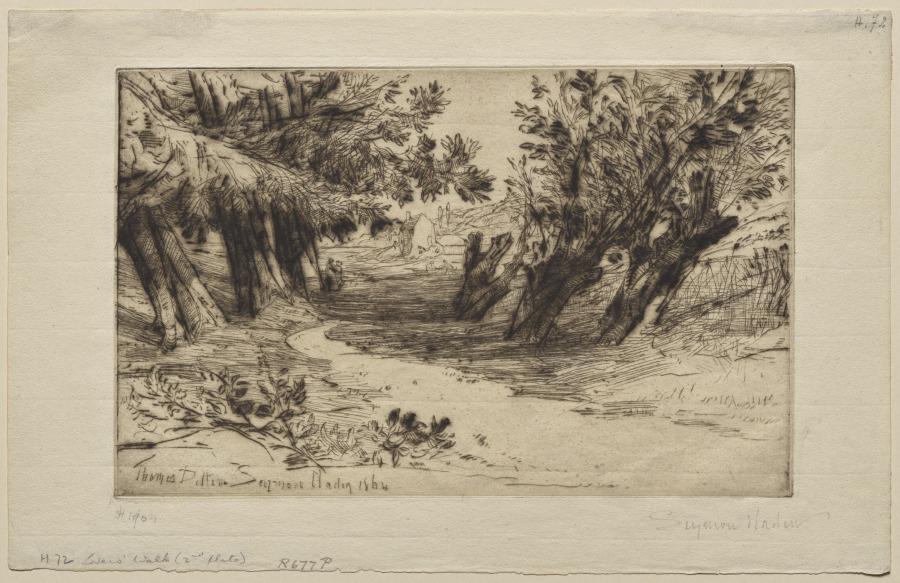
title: The Lovers' Walk (The Second Plate)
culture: England, 19th century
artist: Francis Seymour Haden (British, 1818–1910)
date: 1864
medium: drypoint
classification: Print